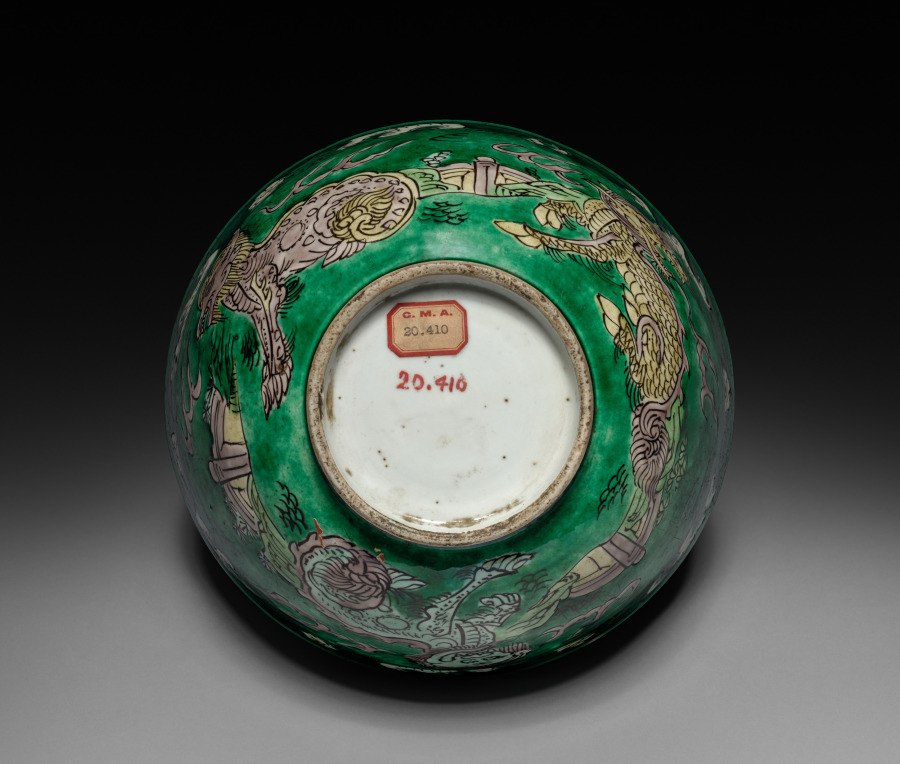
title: Bowl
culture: China, Ming dynasty (1368-1644), Xuande reign (1425-1435)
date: 1426–1435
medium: porcelain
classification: Ceramic